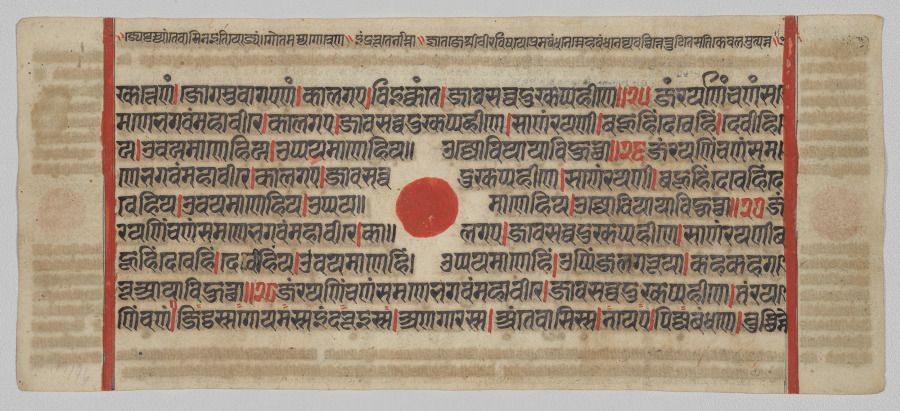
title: Text, Folio 41 (recto), from a Kalpa-sutra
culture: Western India, Gujarat, last quarter of the 15th century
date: c. 1475–1500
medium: Gum tempera, ink, and gold on paper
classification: Painting